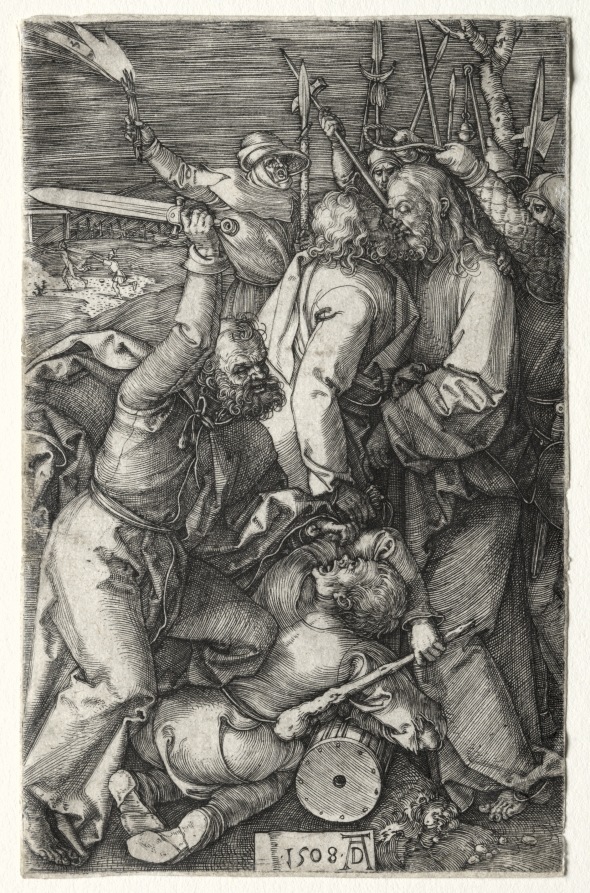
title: The Betrayal of Christ by Judas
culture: Germany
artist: Albrecht Dürer (German, 1471–1528)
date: 1508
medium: engraving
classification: Print